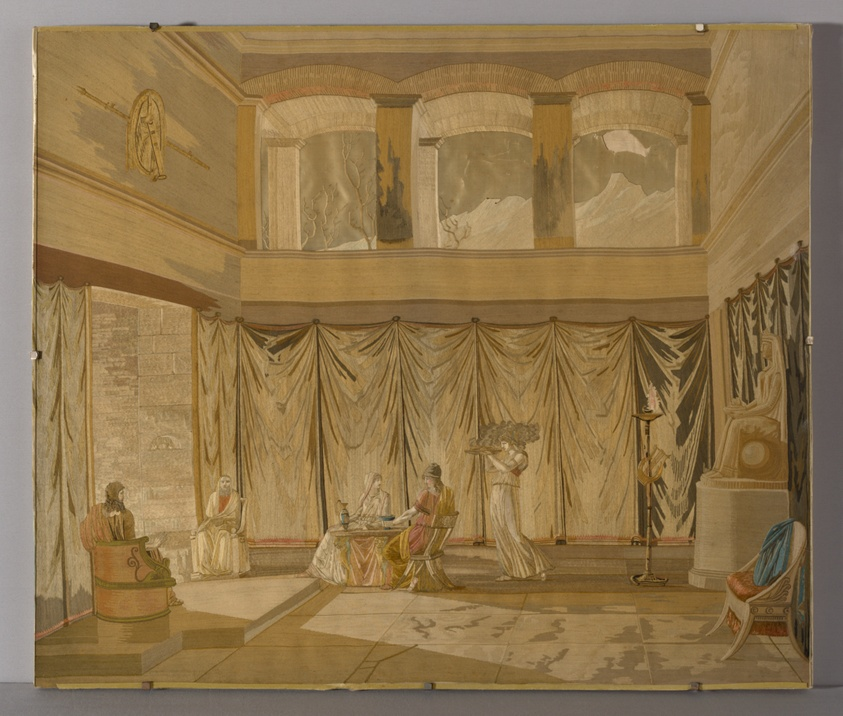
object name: Textile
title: L'Hiver (Winter)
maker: After Antoine-Pierre Mongin (French, 1761-1827); Possibly produced by Camille Pernon et Cie.; France, Lyon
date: Early 19th century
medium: Silk, warp-float faced satin weave; embroidered with silk and chenille yarns in chain and satin stitches; couching; surface pigment added to embroidered stitches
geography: France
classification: textile; needlework (visual works)